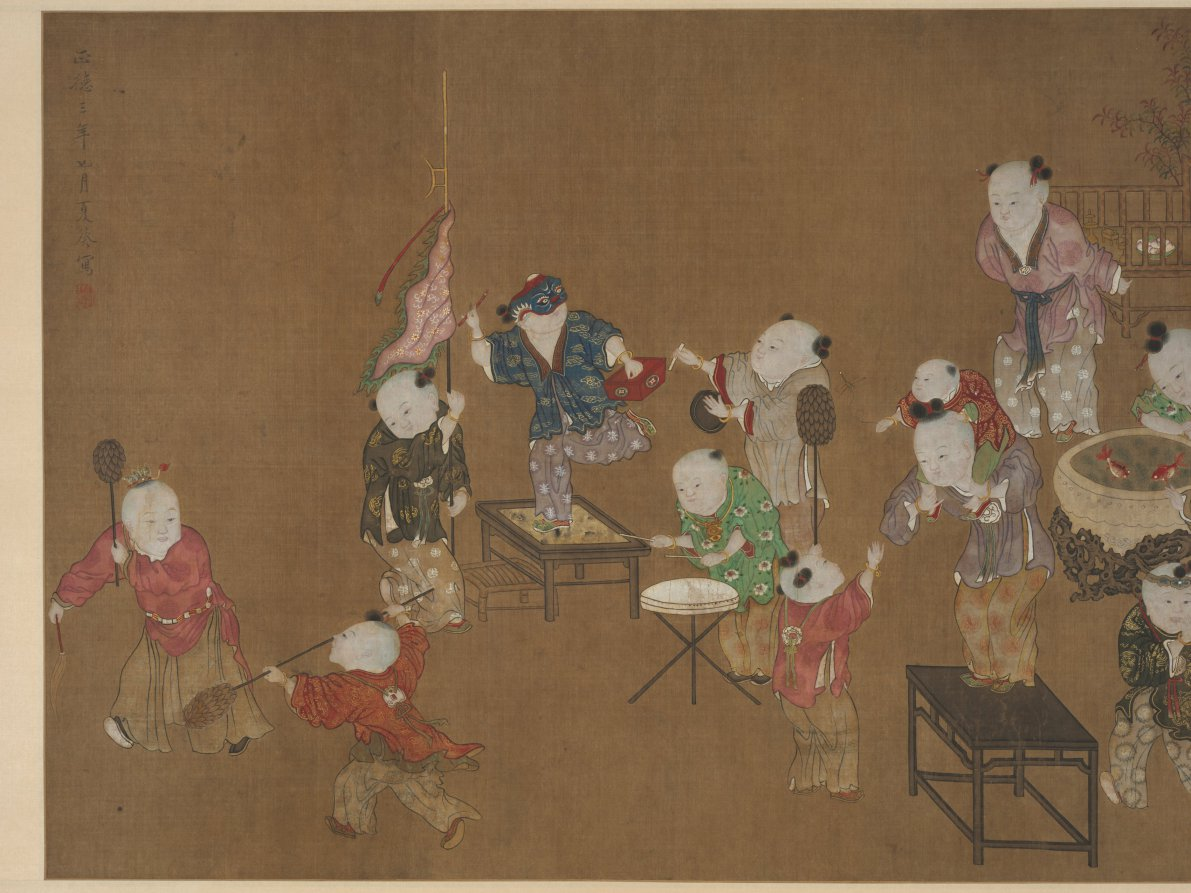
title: Children at Play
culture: China, Ming dynasty (1368–1644)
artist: Xia Kui (Chinese, active c. 1405–1445)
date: 1508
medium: hanging scroll; ink and color on silk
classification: Painting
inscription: 正德三年七月夏葵寫 [Zhengde san nian qi yue Xia Kui xie]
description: Sixteen children engage in scholarly, religious, and military activities, representing the popular “one hundred boys” theme expressing the wish for abundant, successful male offspring. Such paintings conveying auspicious wishes were often displayed during the New Year festival season. Two older boys wear small crowns with red tassels. Another child with a mask holds a brush in one hand, a rice measure in the other. He stands on a low table imitating Kuixing, the God of Examinations and servant to the God of Literature.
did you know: In the foreground on the right are three boys playing a kind of blind man’s bluff.